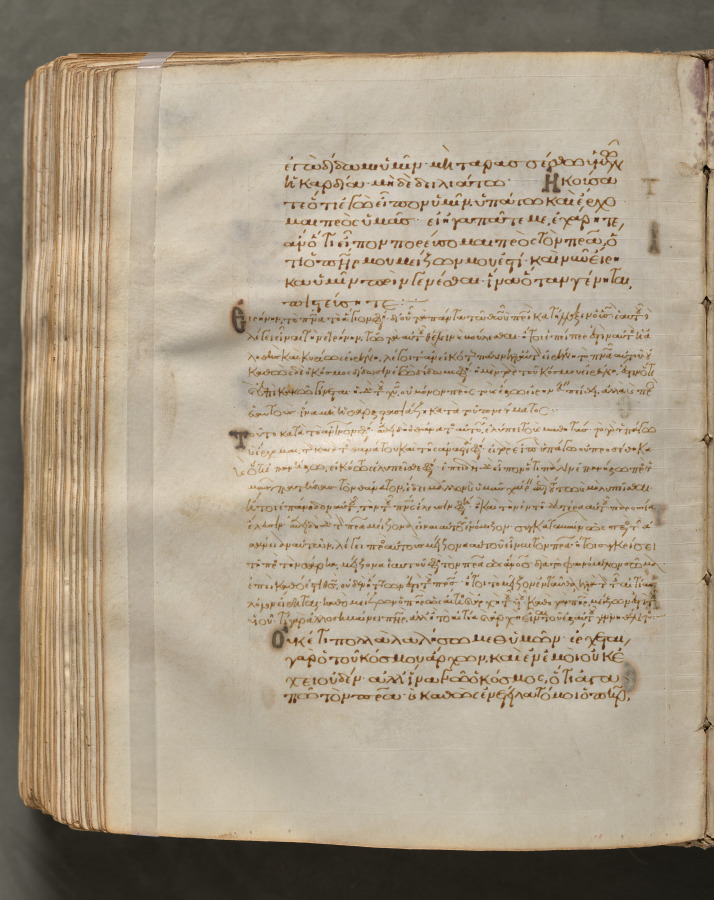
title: Text, folio 395 (verso), from a Gospel Book with Commentaries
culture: Byzantium, Constantinople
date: c. 1000–1100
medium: ink, tempera, and gold on vellum; leather binding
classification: Bound Volume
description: Each of the four gospels in this book opens on a page with brilliantly illuminated borders depicting the author of the text as well as birds—principally peacocks, symbols of the immortality of the soul—and fountains, representing the fountain of life and the salvation of the soul. This volume consists of 428 leaves with texts in Greek. Its level of sophistication suggests that it was probably written and decorated in a monastery in Constantinople.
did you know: Gospel books were carried in procession through Byzantine churches.